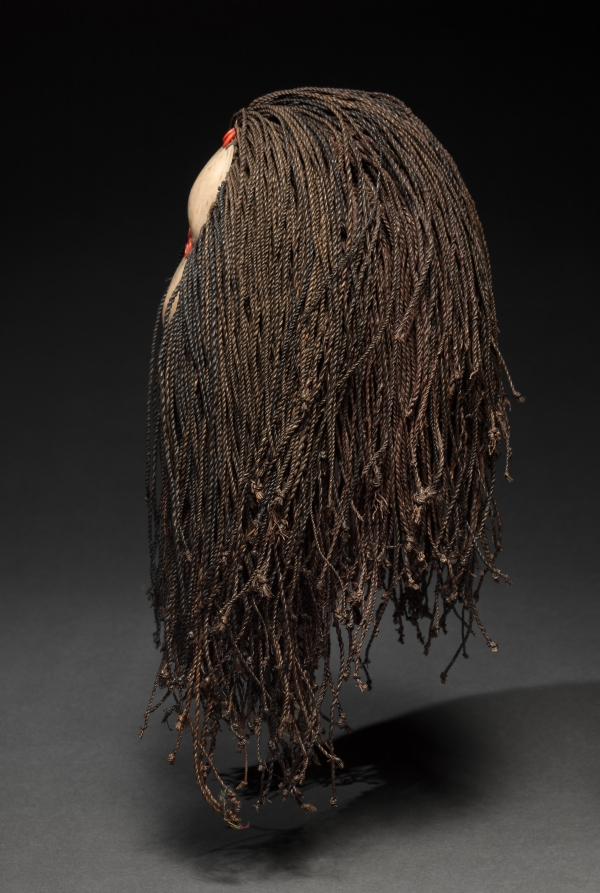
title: Man's Bwami Prestige Cap (sawamazembe)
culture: Africa, Central Africa, Democratic Republic of Congo, Lega-style maker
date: early to mid-1900s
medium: Plant fiber, seashells, seeds, pods, buttons, and probably cotton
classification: Garment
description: Among the Lega people of the eastern Democratric Republic of Congo, headgear was an important indicator of social position. Certain caps, headbands, and headdresses were the exclusive prerogative of the Bwami men's association. This headdress, called sawamazembe, was worn only by high-ranking members of this group. The hat's wig-like form represents a woman's coiffure, illustrating the blurring of gender distinctions among high-ranking Bwami members. The shell ornaments on the front suggest the moon, while buttons and a seed pod provide additional embellishment.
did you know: This prestige cap combines local organic materials and imported machine-made materials like buttons.